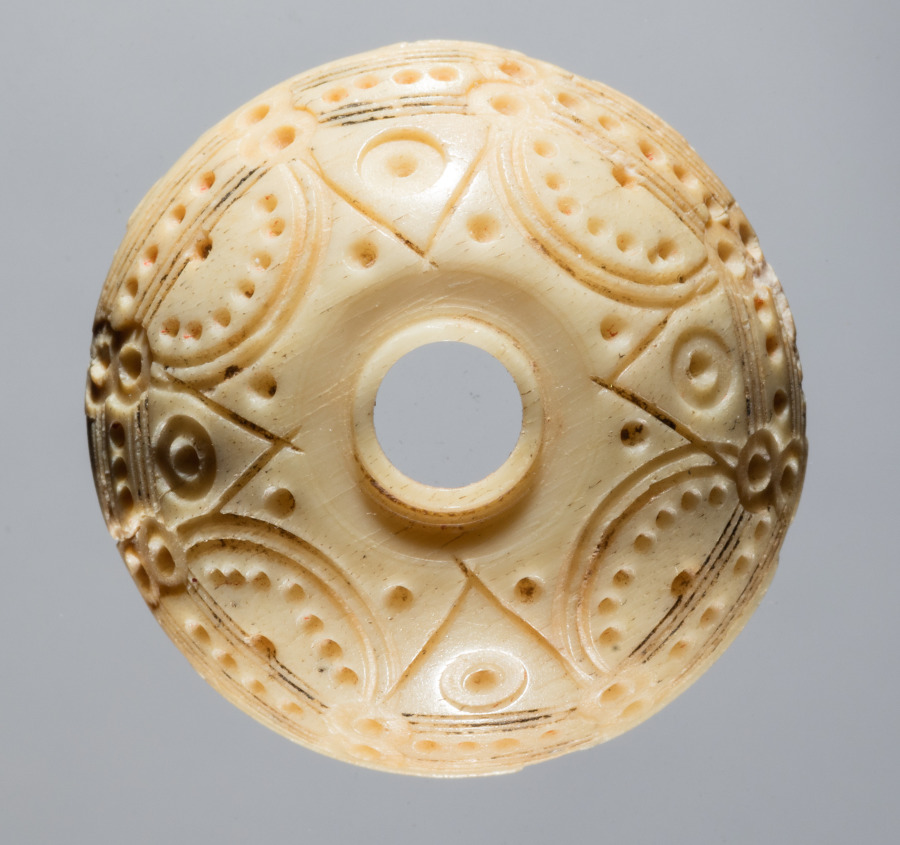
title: Spindle Whorl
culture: Iran, early Islamic period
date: 8th-10th century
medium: bone, incised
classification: Spindle Whorl